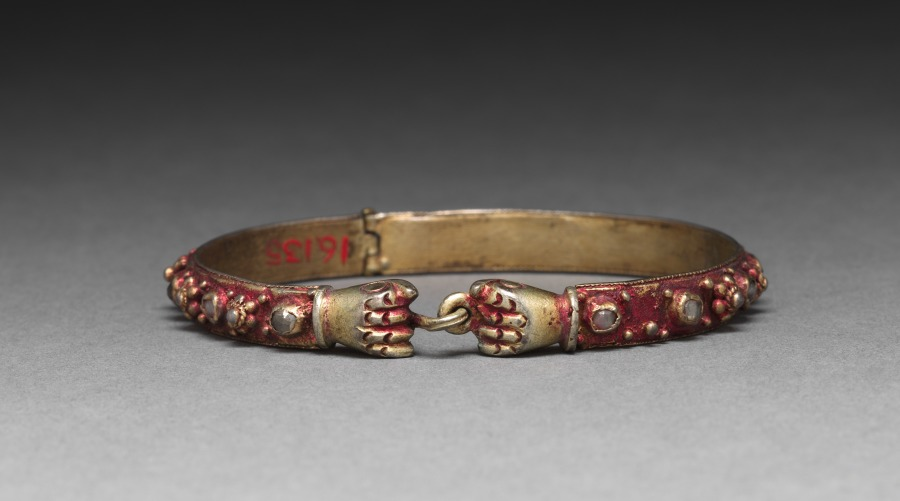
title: Bracelet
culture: Siam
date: 1800s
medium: silver gilt with diamonds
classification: Jewelry